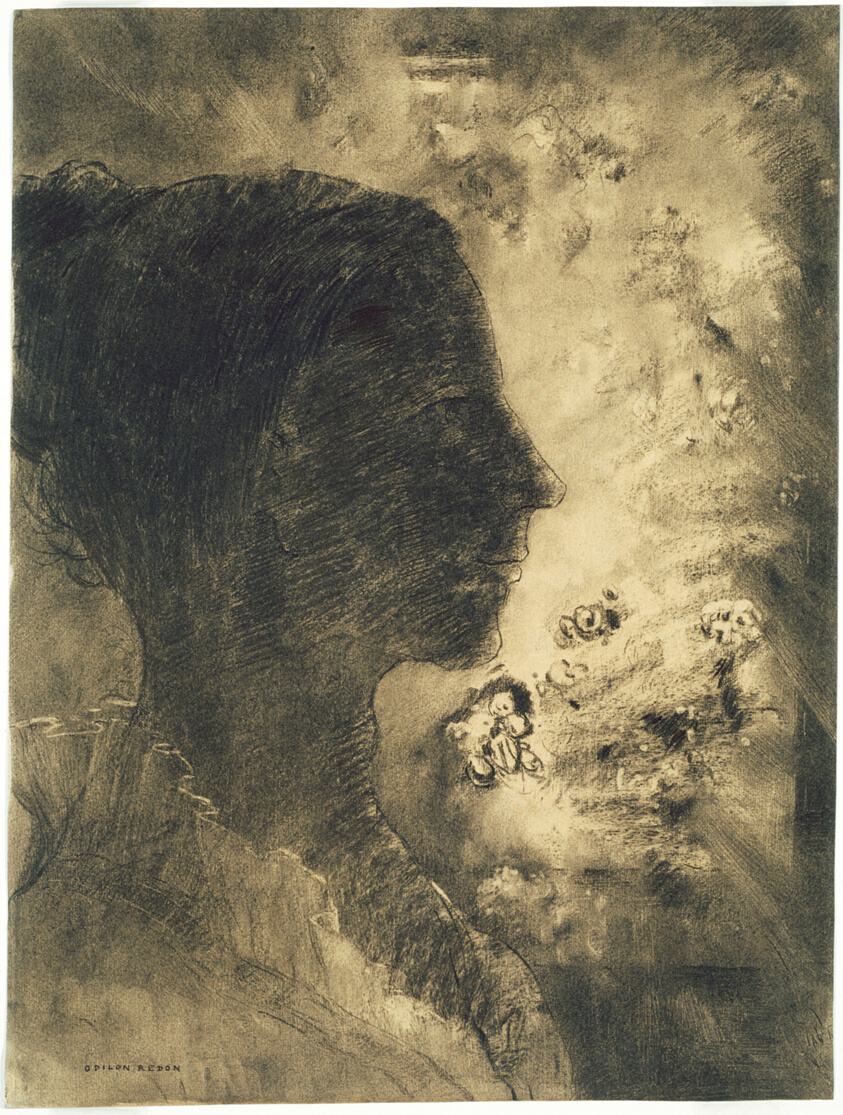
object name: Drawing and Watercolor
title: Profile of Shadow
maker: Odilon Redon (French, 1840-1916)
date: c. 1895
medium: Various charcoals, with stumping, incising, erasing, and subtractive brushwork, on pale-pink wove paper with red and blue fibers altered to a golden tone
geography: France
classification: charcoal; drawings (visual works); prints and drawing; paper